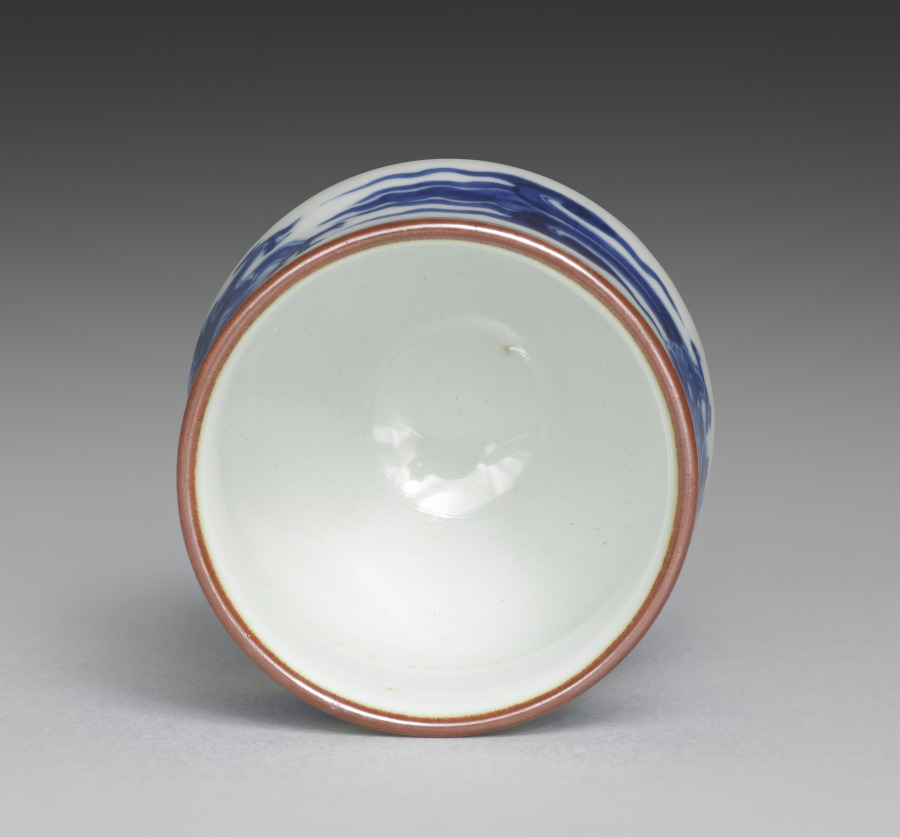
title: Cup from Sake Cups with Dragons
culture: Japan, Meiji period (1868–1912)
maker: Seifū Yohei III (Japanese, 1851–1914)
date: c. 1893–1914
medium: One from a set of six sake cups; porcelain with underglaze blue and iron oxide rims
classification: Ceramic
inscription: 大日本清風造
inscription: 清風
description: Each of these sake cups pictures two backward-looking dragons. The highly stylized creatures resemble jade carvings.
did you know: Seifū Yohei III was inspired by the Chinese mythical animals that were common on porcelain objects made at Jingdezhen in China during the Ming dynasty (1368–1644) and then exported around the world.